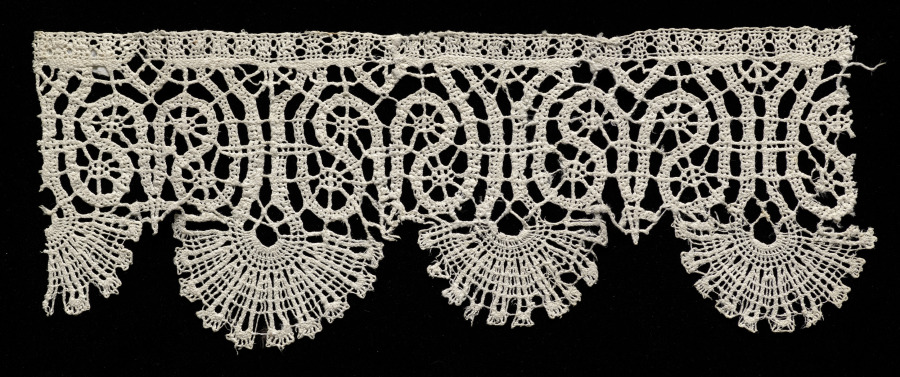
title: Lace Fragment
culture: Italy, Genoa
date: 1600s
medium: Bobbin lace (rose point) edging of bell points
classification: Lace